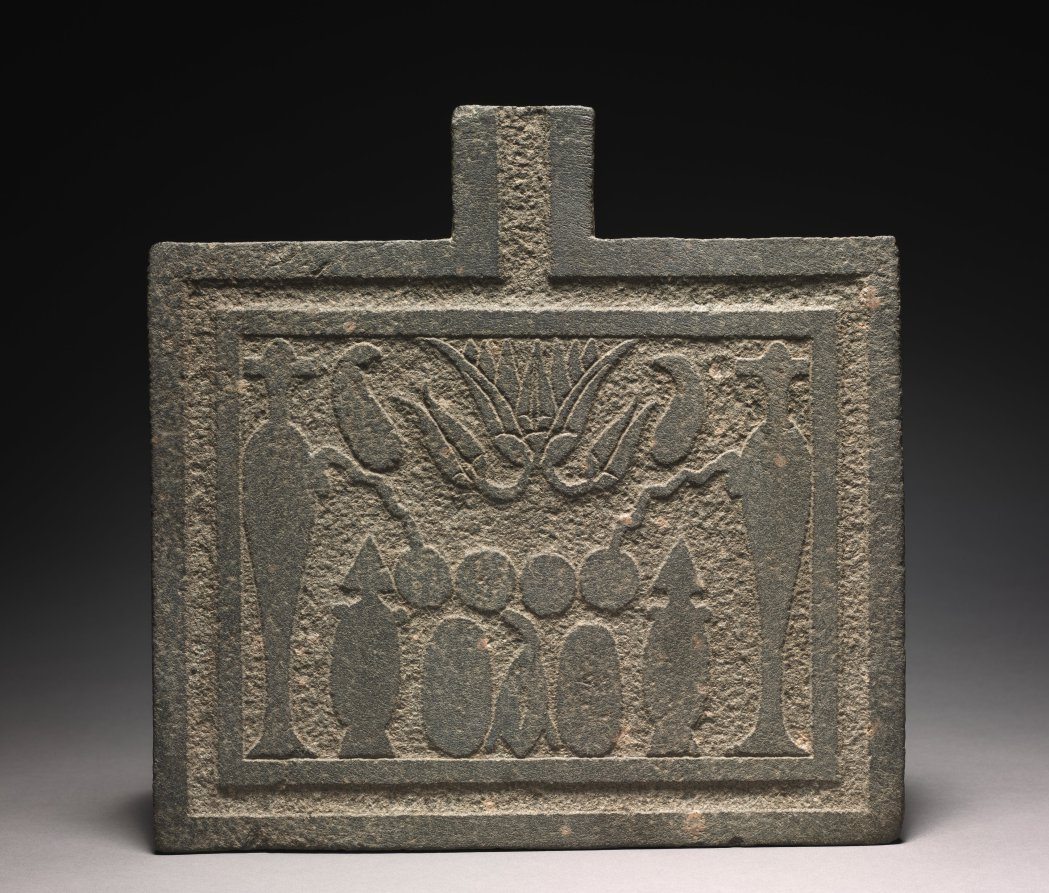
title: Offering Table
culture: Egypt, Greco-Roman period (332 BCE–395 CE), Ptolemaic dynasty (305–30 BCE)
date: 305–30 BCE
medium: granodiorite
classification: Sculpture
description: Offering tables were used in ancient Egyptian funerary rituals to create a connection between the realms of the living and the dead. Often located near or inside tombs, the table was placed flat in front of ka statues, figures designed to contain the life force of the dead, with the carved surface facing up. Water would be poured over the table, sustaining the dead with vitality. The carved relief displays images of libation jars, beer jars, fruit, bread, cucumbers, a trussed fowl, and a lotus flower. These foods were associated with the diet of the gods, emphasizing the deceased’s desire to become divine in the afterlife.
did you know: On offering tables made in earlier time periods, the channel for water usually connects to the main carved surface.